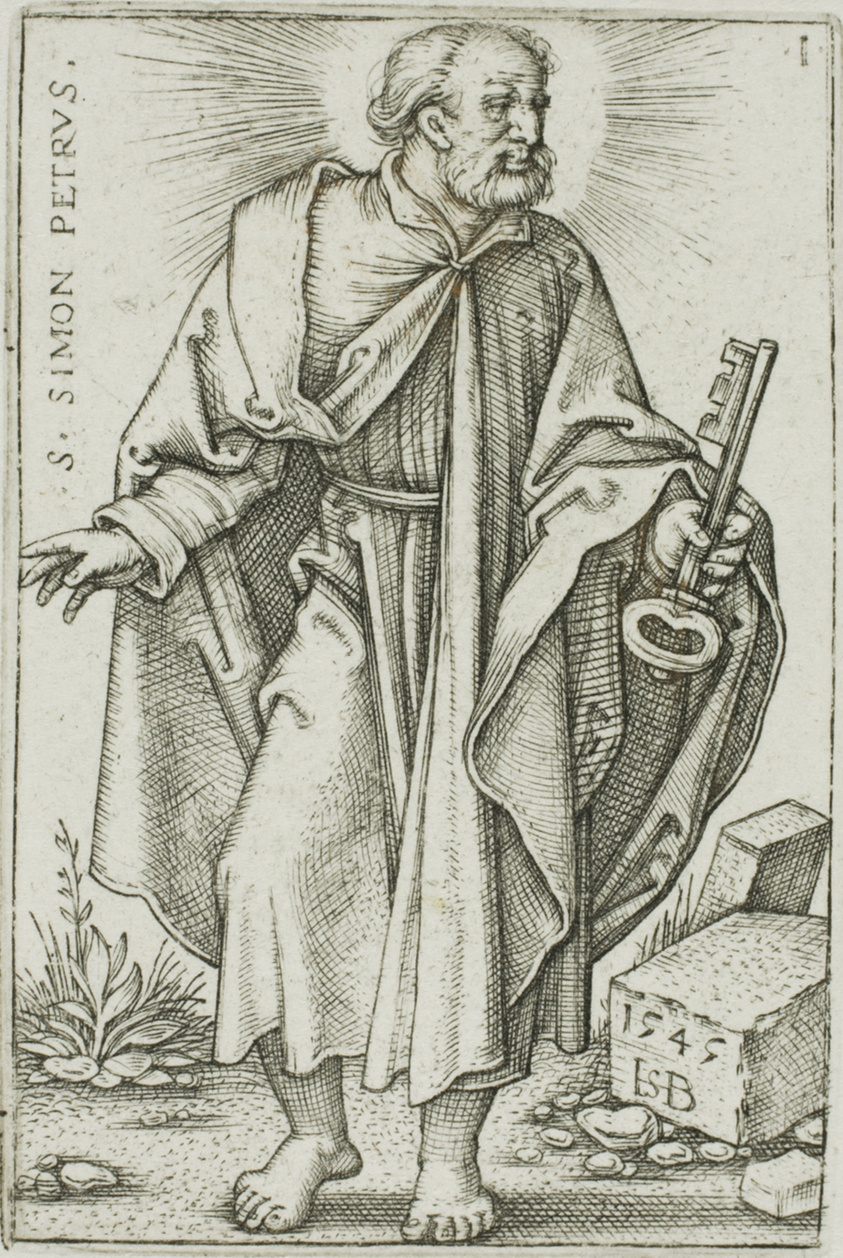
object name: Print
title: St. Peter, plate 1 from The Twelve Apostles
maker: Sebald Beham; German, 1500-1550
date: 1545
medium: Engraving in black on white wove paper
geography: Germany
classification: engraving; print; prints and drawing